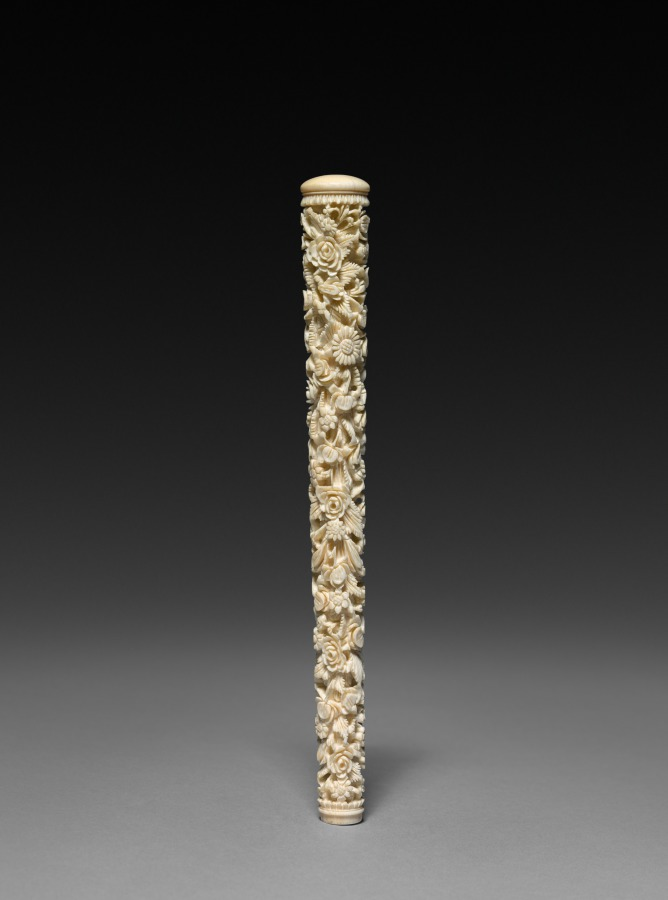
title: Carved Handle for Parasol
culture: Japan, Meiji period (1868–1912)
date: early 1900s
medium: ivory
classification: Ivory